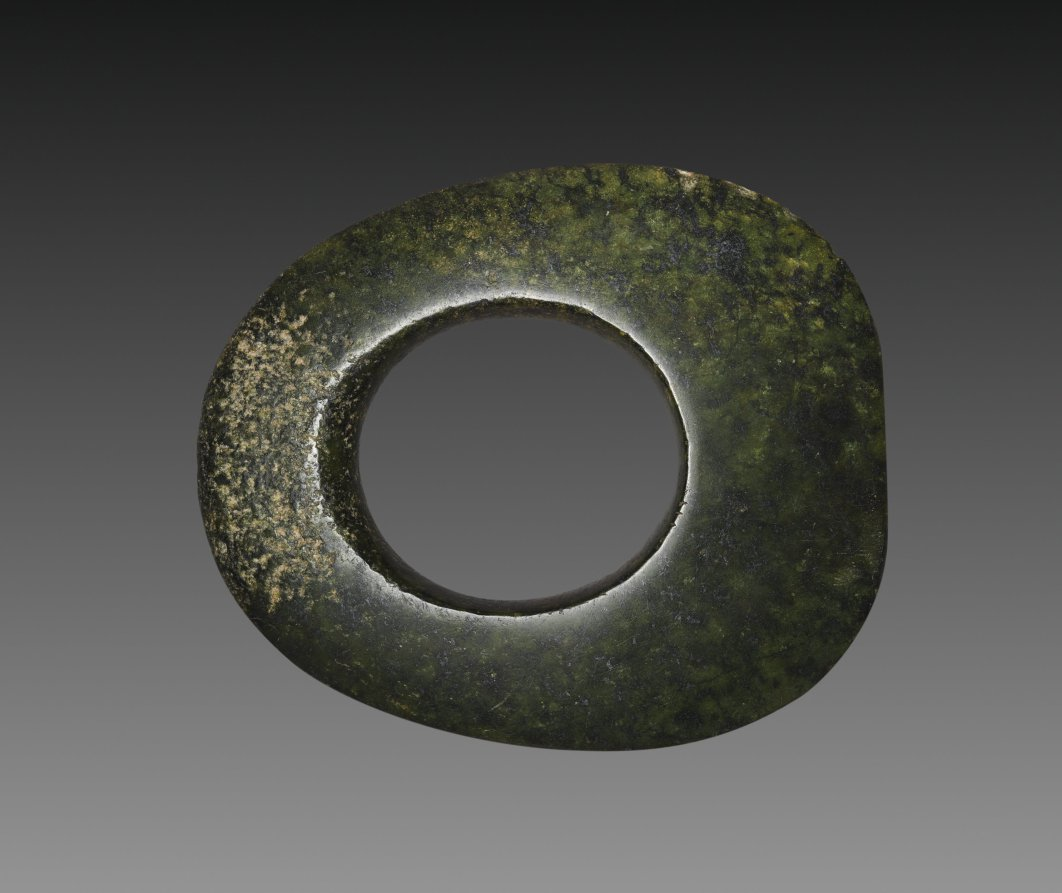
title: Ceremonial Disk-Axe (Yue)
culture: Northeast China, Neolithic period, Hongshan culture (4700–2920 BCE)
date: c. 4700–2920 BCE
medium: serpentine stone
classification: Jade